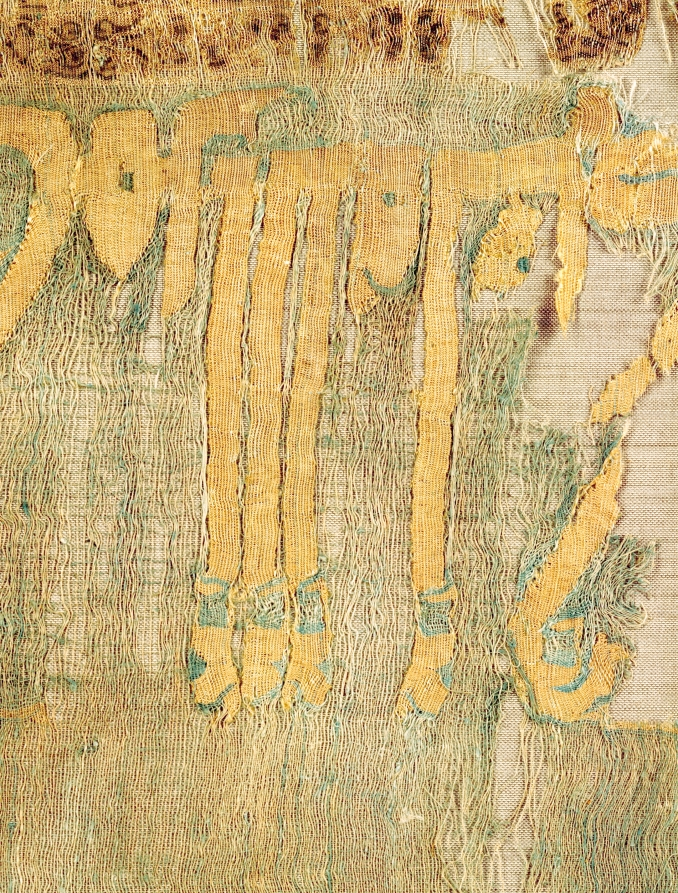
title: Turban end with tiraz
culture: Egypt, Tinnis, Fatimid period, datable to 983-90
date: 983–990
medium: plain weave with inwoven tapestry weave: linen and silk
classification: Textile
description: This finely woven linen cloth, dyed a cherished pistachio color, was cut from a longer fabric worn folded and wrapped as a turban with the silk tapestry-woven decoration shown off in the front. It contains two opposing rows of nearly identical Arabic text separated by a row of medallions displaying a pair of birds. The historical text begins by praising Allah, asking that he assist the Caliph al-‘Aziz and bless him and his ancestors. The inscription also specifies that the vizier Abu ibn Yusuf ordered the cloth from the private factory (tiraz) in Tinnis. This luxurious cloth could have been a gift from the caliph in Cairo during the Fatimid period to a courtier or visiting dignitary. It is one of the finest known examples.